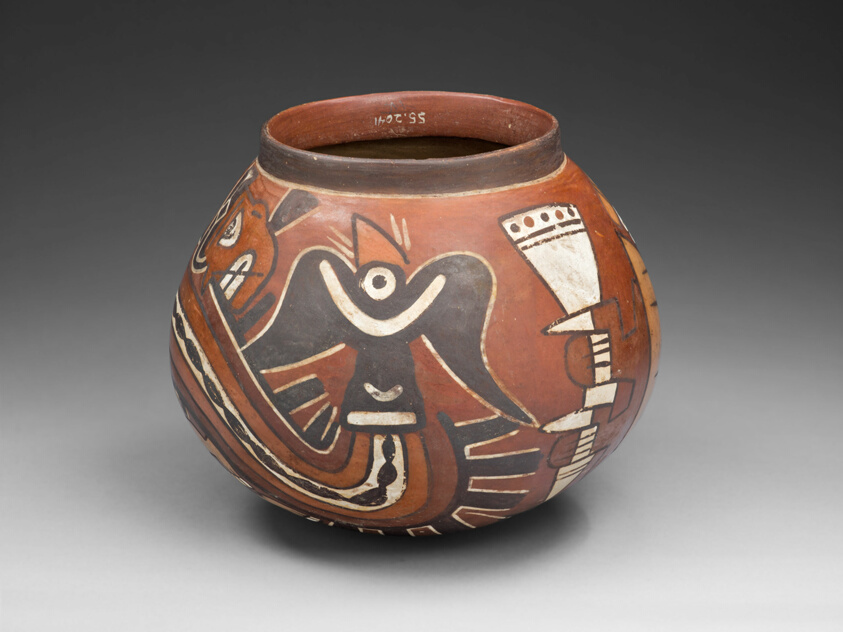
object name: Vessel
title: Vessel Depicting a Costumed Ritual Performer Holding a Staff and a Trophy Head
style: nazca, early intermediate period, Pre-Columbian, americas, Arts of the Americas, andean, andes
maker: Nazca; South coast, Peru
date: 180 BCE–500 CE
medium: Ceramic and pigment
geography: Peruvian South Coast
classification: earthenware; art of the americas; ceramics; vessel